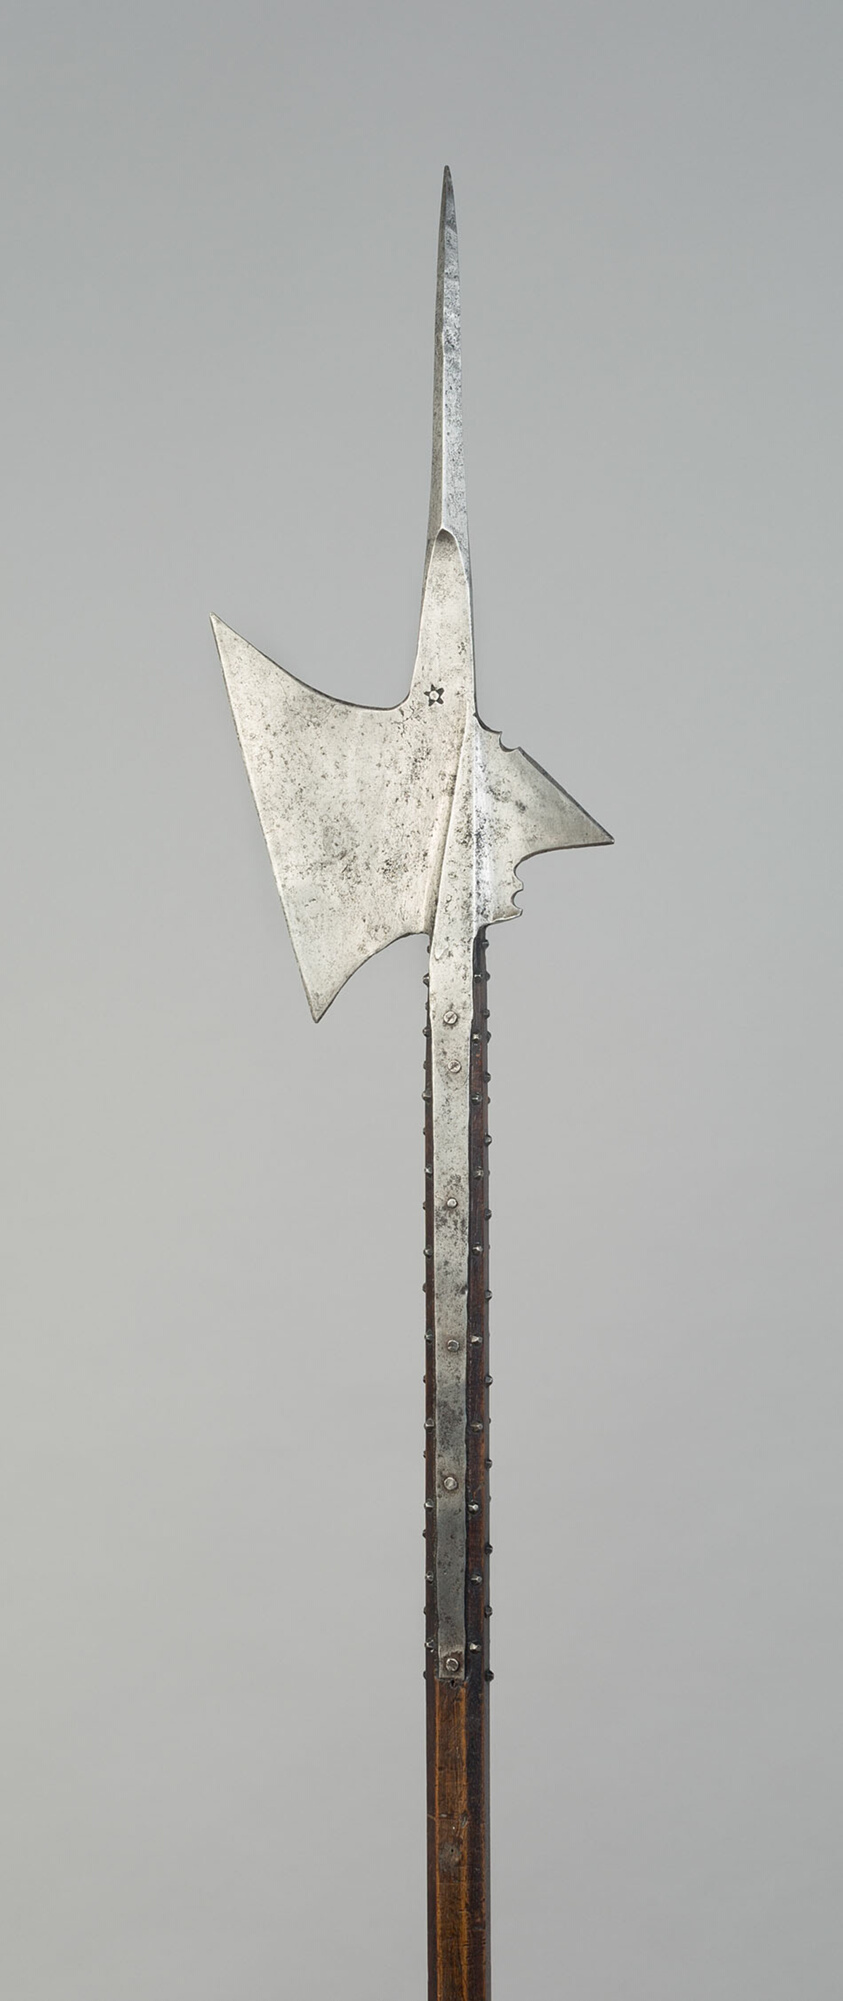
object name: Arms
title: Halberd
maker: German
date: 1500-50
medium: Steel and wood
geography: Germany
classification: edged weapon-staff; arms; arms and armor